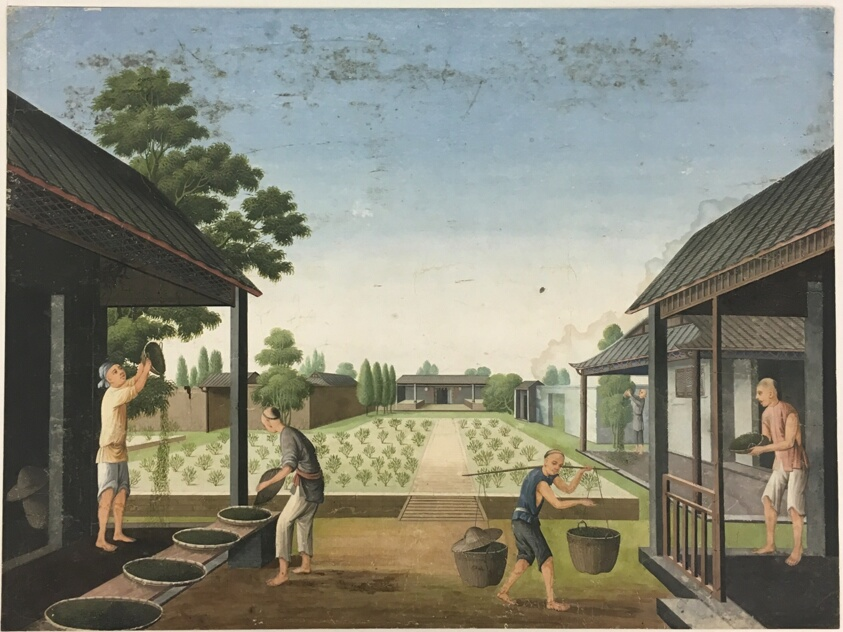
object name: Painting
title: Spinning Cloth, Preparing Tea Leaves, Preparing Silk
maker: China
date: Early 19th century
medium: Colors on paper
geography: China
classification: painting; asian art; print